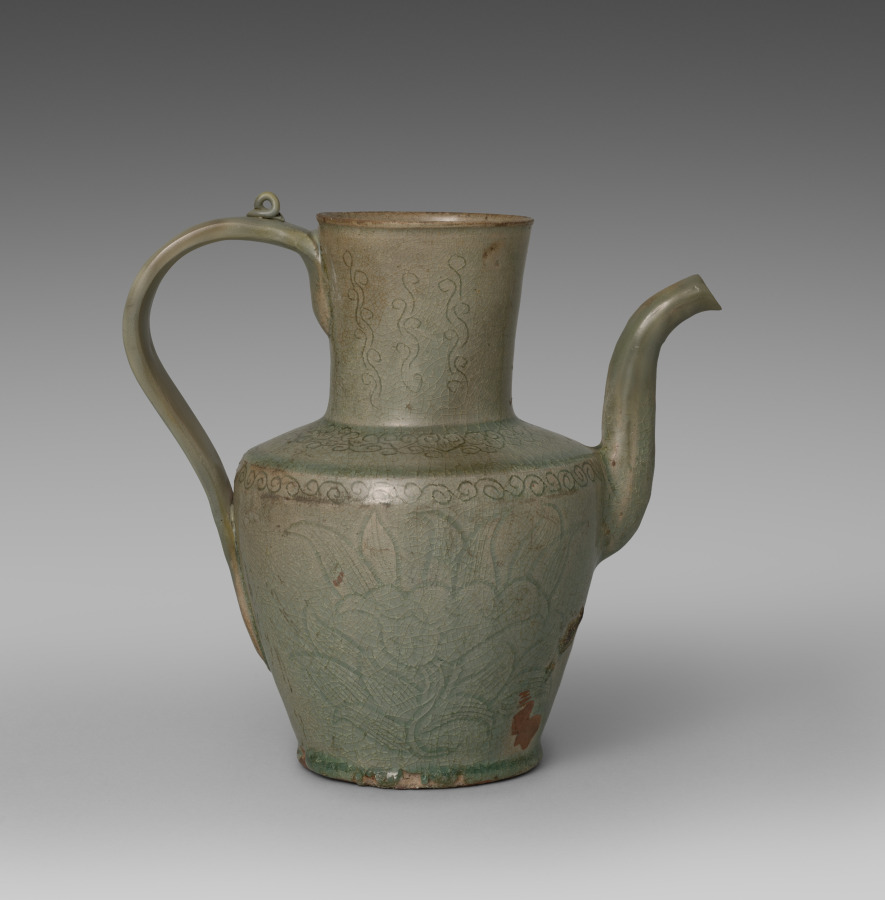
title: Wine Pot with Incised Lotus Design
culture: Korea, Goryeo dynasty (918–1392)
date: 918–1392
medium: celadon ware with incised and carved decoration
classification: Ceramic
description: As early as the seventh century, the practice of drinking tea and wine became an important part of elite culture in Korea. Elites of the Goryeo period commissioned a variety of types of utensils and vessels including this elegant wine pot with the incised image of lotus flowers, not only to make their drinking experience more exciting, but also to show their appreciation of nature.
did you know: A small loop on the handle was intended to secure the lid (now missing) on top of the pitcher through a cord or chain.